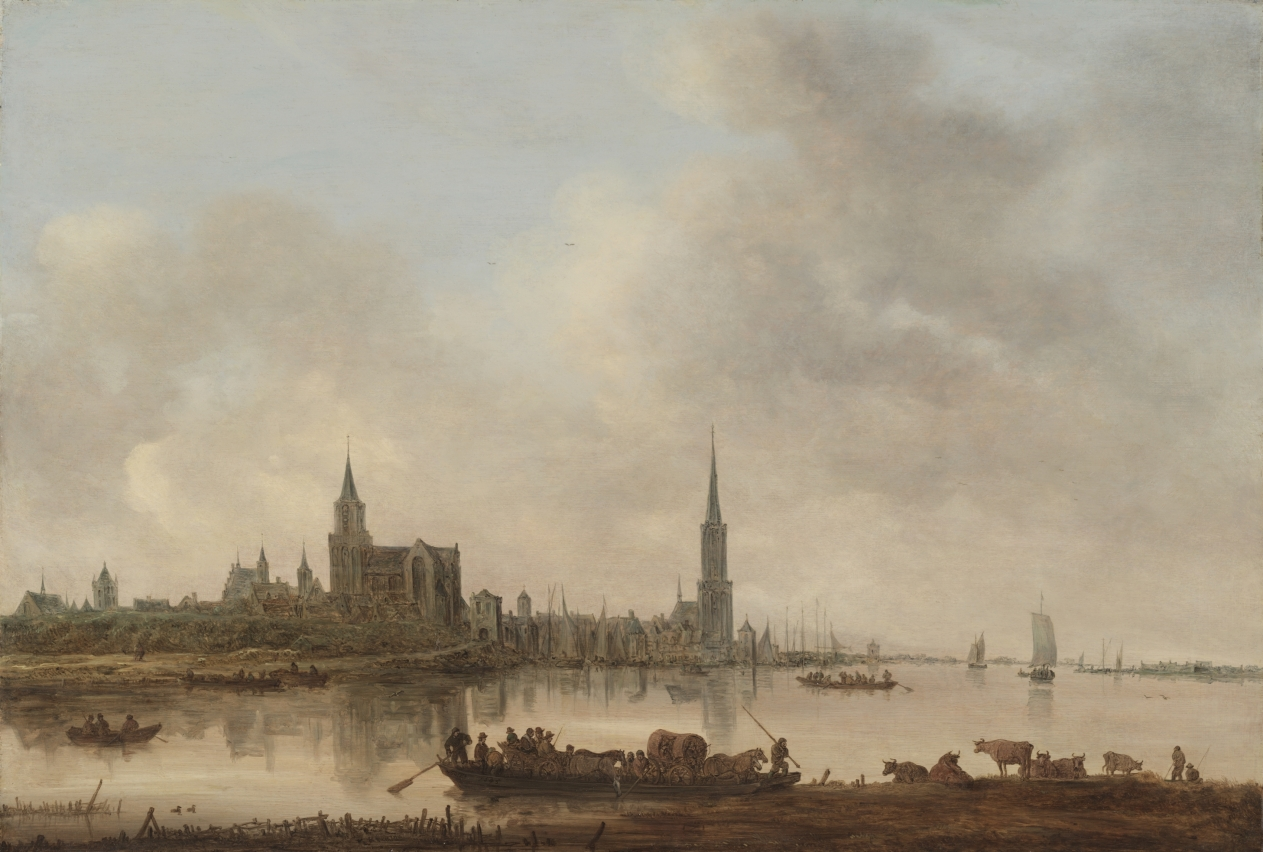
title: View of Emmerich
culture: Netherlands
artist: Jan van Goyen (Dutch, 1596–1656)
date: 1645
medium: oil on wood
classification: Painting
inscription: Signed lower center on ferry: "VGoyen 1645"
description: Jan van Goyen’s deceptively simple paintings record remarkably realistic impressions of weather, space, and the shifting interactions of land, water, light, and air. He worked with swift, intuitive brushstrokes and a limited range of colors: gray, brown, cool blues, and earthy greens. The artist often went on sketching trips along the Rhine River, visiting cities such as Arnhem, or the German city of Emmerich, depicted here. In the foreground, a shallow boat ferries passengers and horse-drawn wagons across the river.